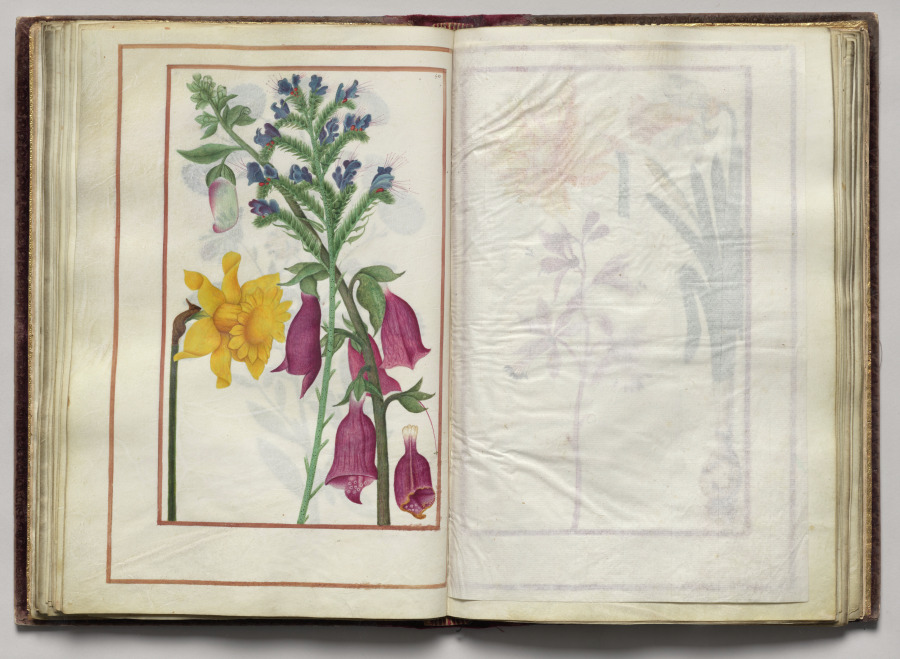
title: Yellow Narcissus, Blue Bugloss, and Foxglove, folio 25 (verso), from Florilegium (A Book of Flower Studies)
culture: France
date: 1608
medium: watercolor, ink, silver, and gold over occasional traces of pencil, on vellum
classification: Bound Volume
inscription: Dated: Poitiers 1608 (on frontispiece) Signed: On frontispiece in black ink, lower right: Van Kuyk Notation on drawing: Frontispiece: in pencil, lower margin: * élève de Van Kessel, peintre flammand (* in pencil also appears in front of Van Kuyk's name).